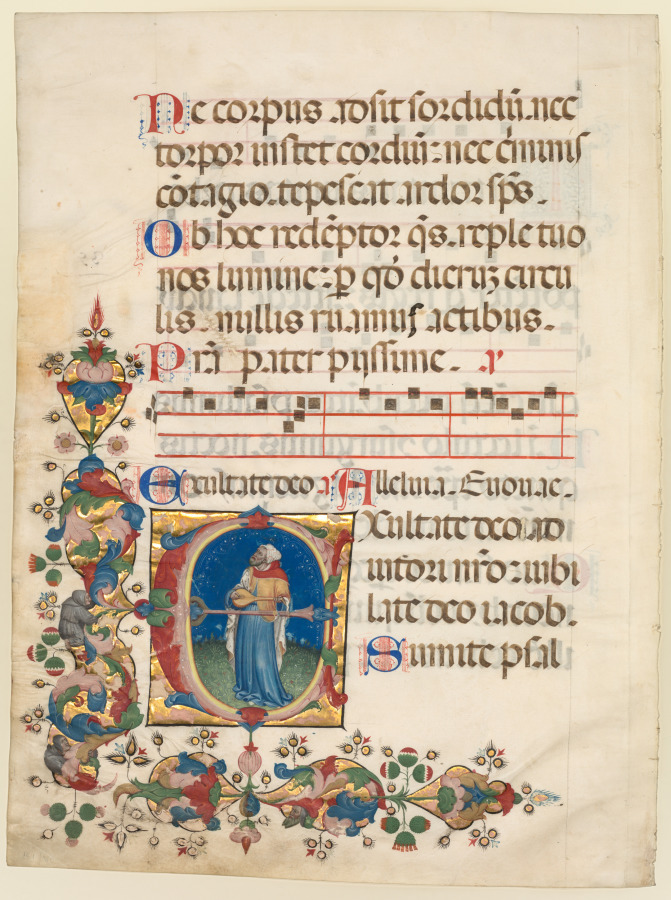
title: Single Leaf Excised from a Choir Psalter: Initial E[xultate Deo] with King David Playing the Lute (Psalm 80)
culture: Italy, Bologna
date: c. 1408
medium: ink, tempera, and gold on vellum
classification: Manuscript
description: This leaf once formed part of a deluxe choir psalter produced for the Franciscan convent of Bologna (founded 1229). The initial E with a portrait of King David illustrates the introduction to Psalm 80: Exultate Deo (Rejoice to God). King David, as the author of the Psalms, is prominently illustrated in psalter initials. An abundant spray of colorful acanthus leaves with clambering Franciscan friars provides decoration for the lower left margins and confirmation that it was made for Franciscan use.